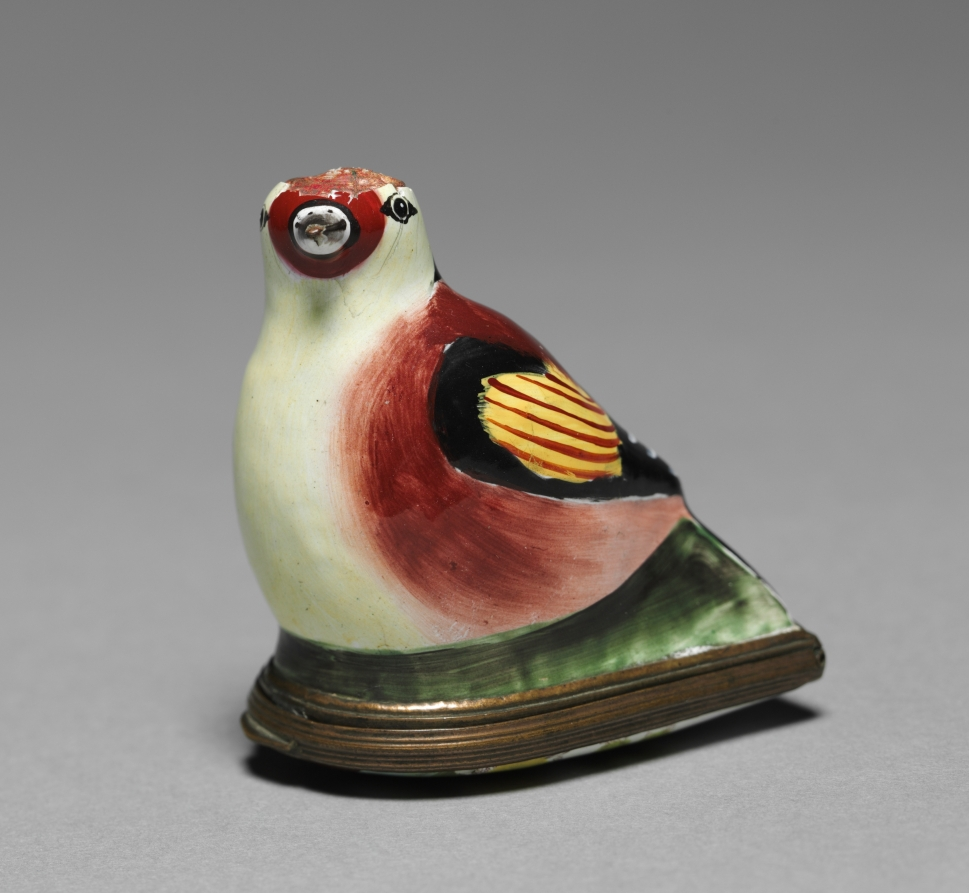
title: Bonbonniere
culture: England, Staffordshire, late 18th Century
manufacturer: Staffordshire Factory (British)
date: late 1700s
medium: enamel on copper with metal mounts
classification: Miscellaneous